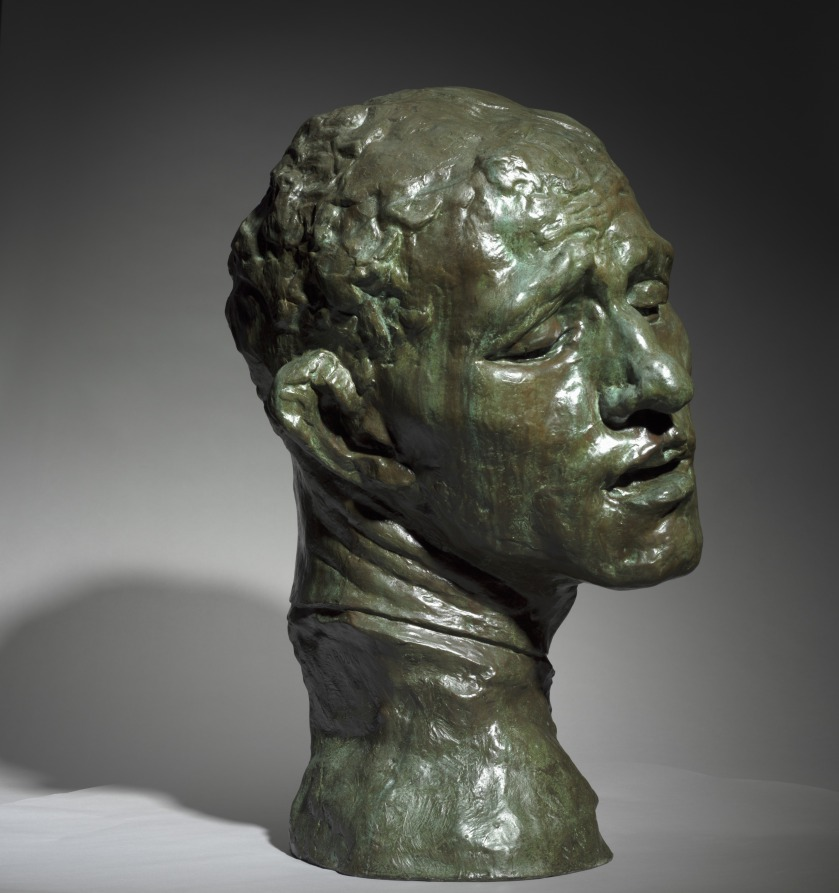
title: Heroic Head of Pierre de Wissant, One of the Burghers of Calais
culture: France, 19th century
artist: Auguste Rodin (French, 1840–1917)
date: 1886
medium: bronze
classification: Sculpture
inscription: inscribed at neck, left: A.Rodin; inscribed lower back: Alexis Rudier/Fondeur-Paris.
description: This sculpture depicts one of the figures in Rodin’s large public monument The Burghers of Calais (1884–89), featuring six French men who volunteered to be taken prisoner by the English in exchange for lifting the siege of Calais during the Hundred Years War (1337–1453). Pierre de Wissant’s anguished expression suggests extreme mental suffering as he contemplates his expected execution. Rodin exhibited a life-size version of the figure as an independent work before completing the monument. He later made multiple versions in various sizes and media.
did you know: This sculpture depicts the head of a figure from Rodin's large public monument The Burghers of Calais (1884-89). The CMA also owns a plaster version of the head.